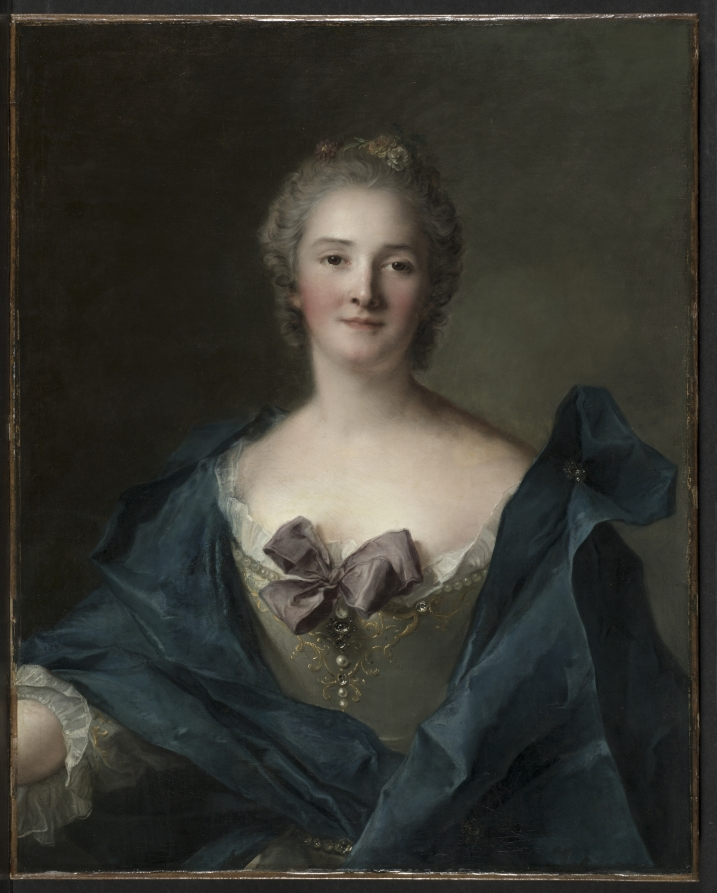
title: Portrait of a Woman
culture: France, 18th century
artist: Jean-Marc Nattier (French, 1685–1766)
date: c. 1748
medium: oil on canvas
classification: Painting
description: Jean-Marc Nattier was a favorite portraitist of King Louis XV of France. He held the lucrative position as the court painter for Queen Mary Lesczynski, the daughter of the exiled king of Poland. The portrait was long thought to be of Madame Henriette de France, one of the daughters of Louis XV and Queen Mary Lesczynski, but this identification is no longer accepted and the sitter remains unknown. There has been considerable confusion over the identity of many of Nattier's sitters, as they tend to conform to an idealized concept of female beauty.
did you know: Though the sitters in his portraits often lack individualized traits, Nattier was fervently sought by French aristocratic women.